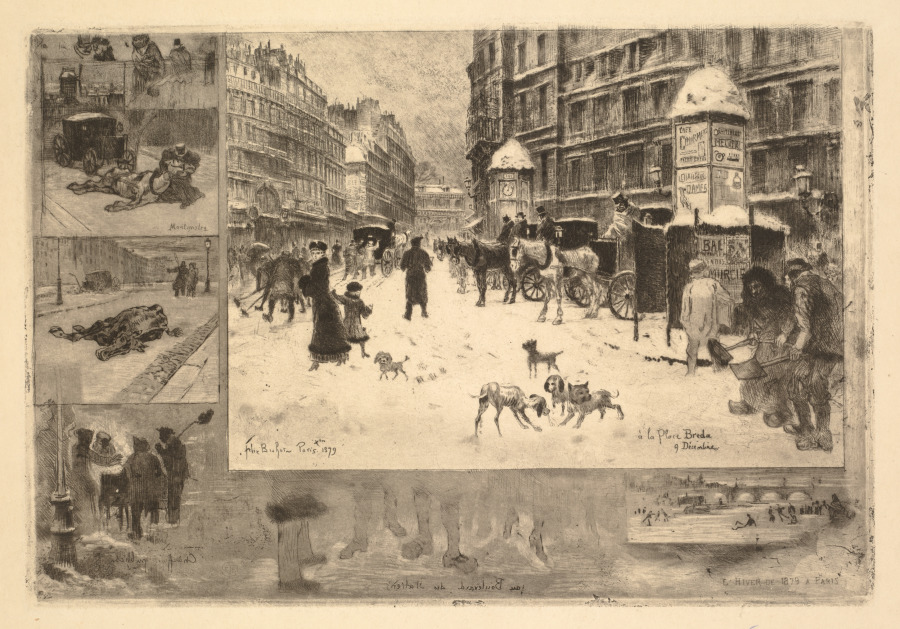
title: Winter in Paris (L’hiver à Paris or La neige à Paris)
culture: France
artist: Félix Hilaire Buhot (French, 1847–1898)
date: 1879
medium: Etching and aquatint with roulette and drypoint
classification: Print